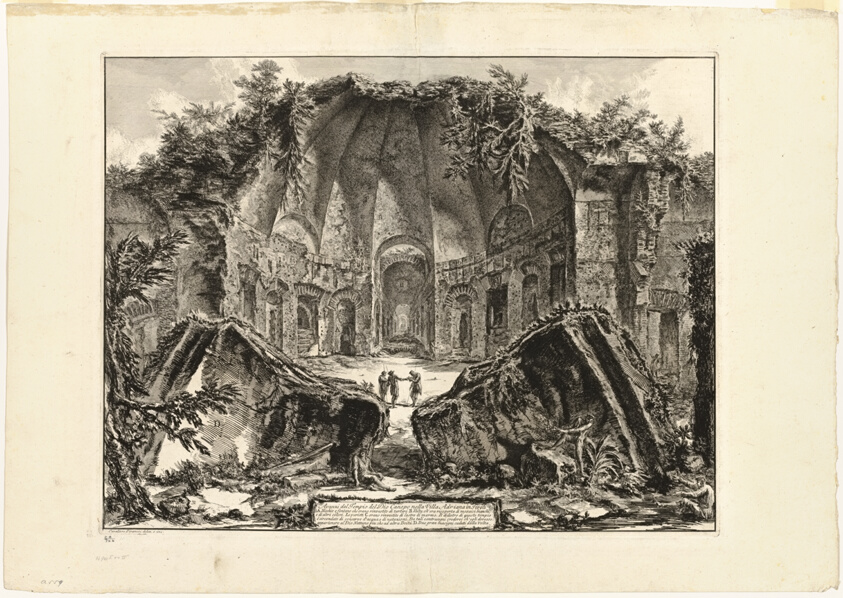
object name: Print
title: Remains of the temple of the god Canopus at Hadrian's Villa, Tivoli, from Views of Rome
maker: Giovanni Battista Piranesi (Italian, 1720-1778)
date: 1768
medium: Etching on heavy ivory laid paper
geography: Italy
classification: etching; print; prints and drawing